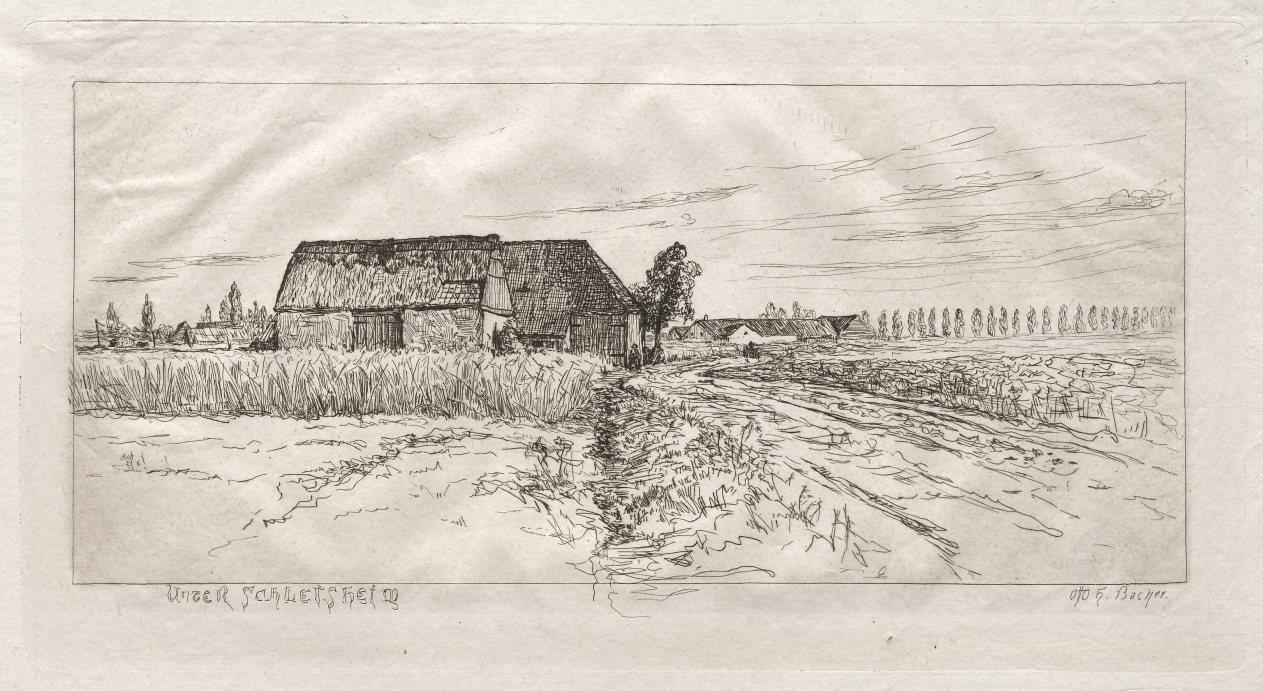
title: Unter Schleissheim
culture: America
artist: Otto H. Bacher (American, 1856–1909)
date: 1879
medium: etching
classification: Print